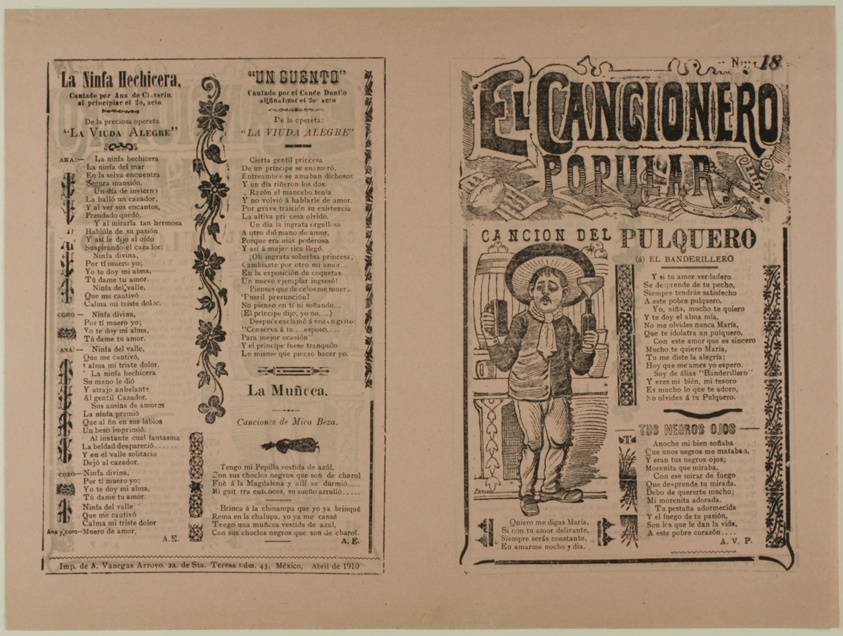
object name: Print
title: El cancionero popular, num. 18 (The Popular Songbook, No. 18)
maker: José Guadalupe Posada (Mexican, 1852-1913)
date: 1910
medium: Photo relief etching on pink wove paper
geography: Mexico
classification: relief etching; print; prints and drawing